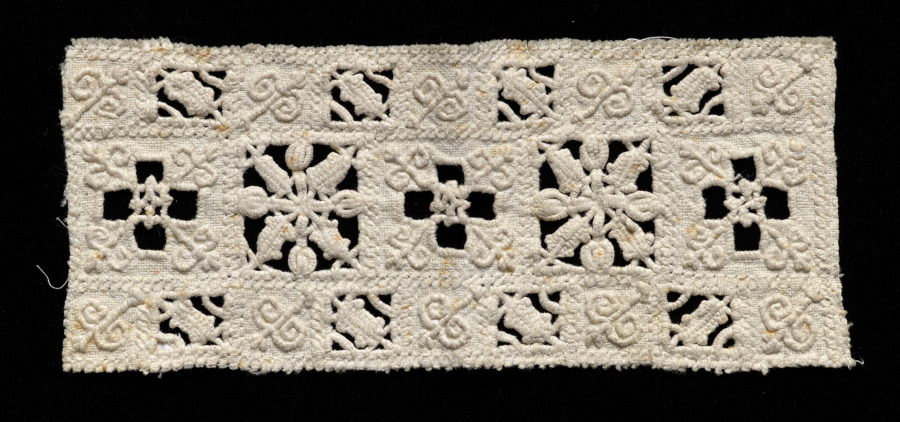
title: Lace fragment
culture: Italy, Venice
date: 1500s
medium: Linen: needle lace (cutwork and reticella) insertion with embroidery; curl stitch (punto aria)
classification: Lace